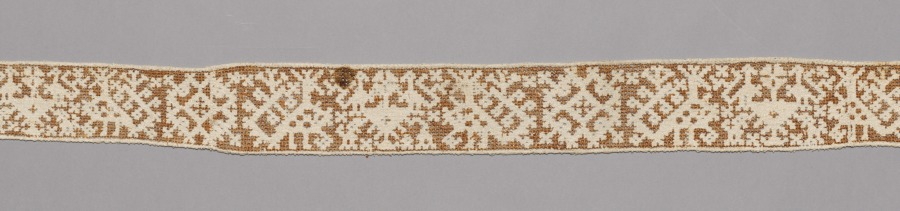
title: Lace Band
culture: Italy, Sicily, 1500s-1600s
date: 1500s-1600s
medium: Linen: needle lace (drawnwork)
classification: Lace